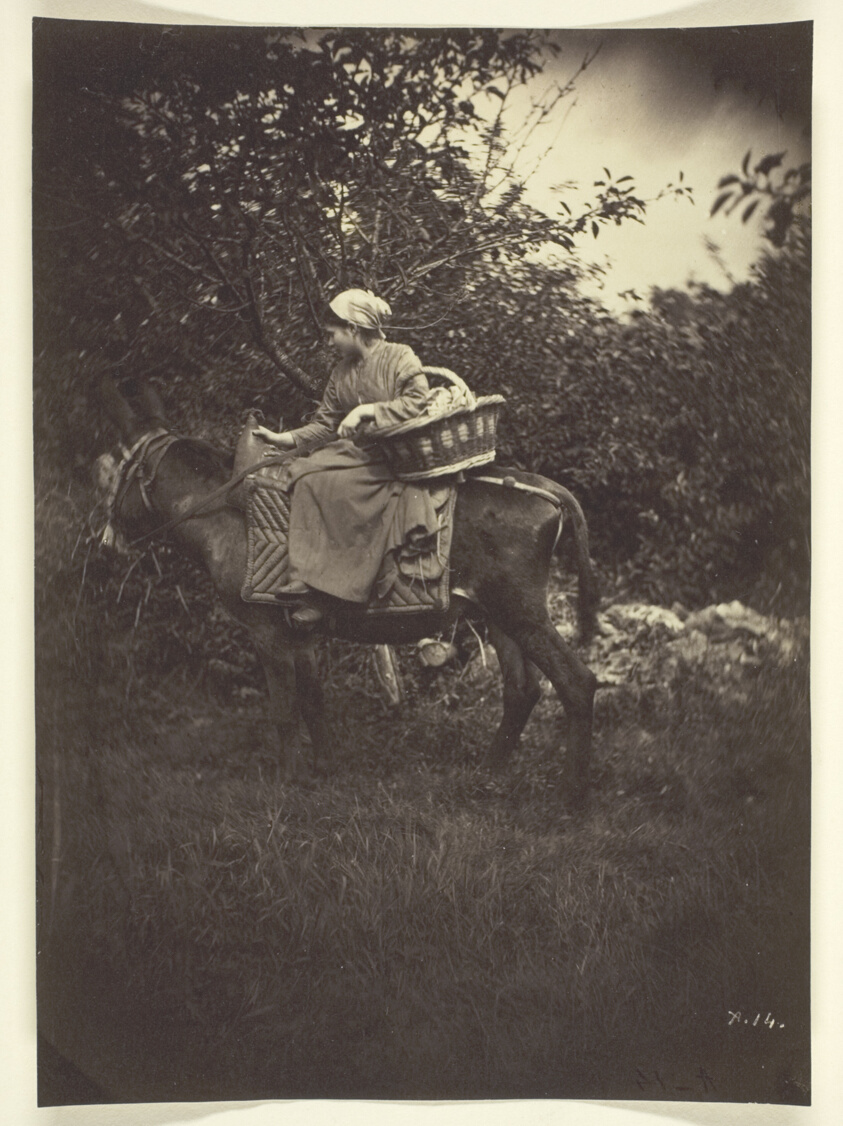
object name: Photograph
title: Female Peasant Riding Donkey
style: 19th century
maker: Giraudon’s Artist; French, active c. 1875–1880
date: 1870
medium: Albumen print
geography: France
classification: photograph; albumen silver print; photography